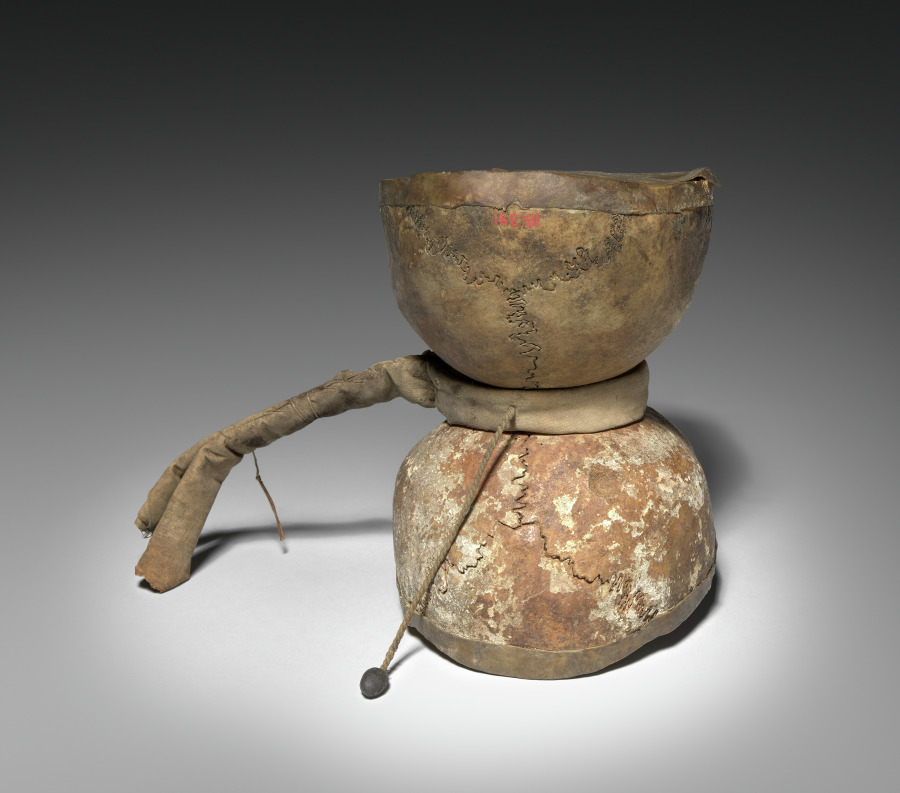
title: Ritual Drum (damaru)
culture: Tibet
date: c. 1800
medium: skull bone, cloth, hemp fiber, leather, and skin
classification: Musical Instrument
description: Damaru drums are made from the tops of two skulls joined in the center and sounded by rapidly turning it side to side so the ends of the cords fly up to sound against the stretched skin. In Hindu and Buddhist rituals, the rhythm of the damaru references the ongoing, relentless beat of time. The material of bone reminds practitioners of the inevitability of death in the course of time.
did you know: Dancing Shiva, in his form as Nataraja, holds a damaru in one hand.